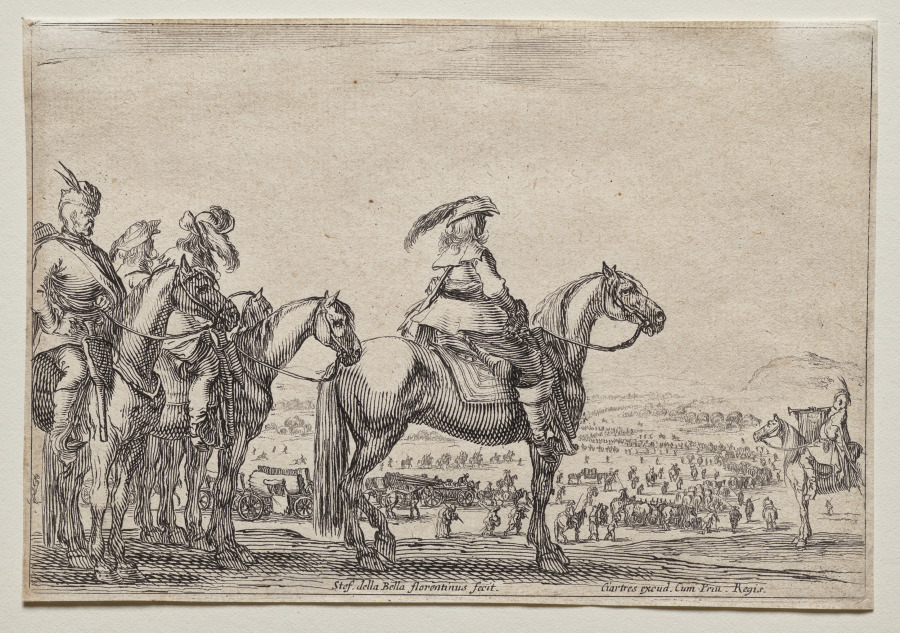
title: An Enemy on the March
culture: Italy, 17th century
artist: Stefano Della Bella (Italian, 1610–1664)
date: c. 1645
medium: etching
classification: Print